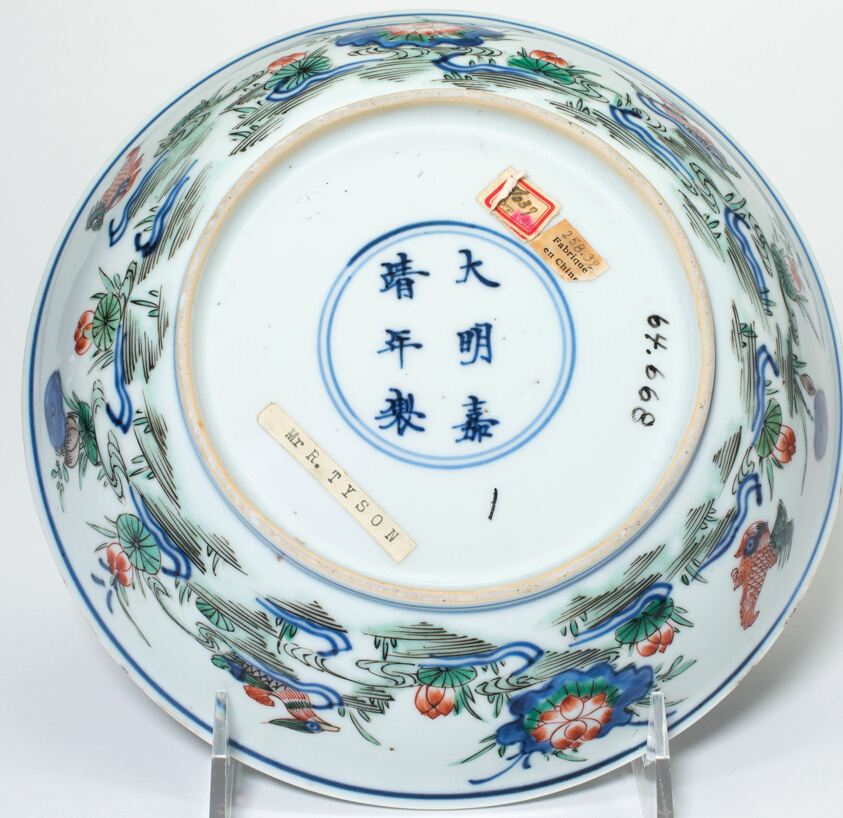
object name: Vessel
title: Dish with Bird and Duck by Lotus Pond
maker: China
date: Qing dynasty (1644–1911)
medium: Porcelain painted in underglaze blue and overglaze polychrome (red and green) enamels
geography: China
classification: porcelain; asian art; ceramics; vessel